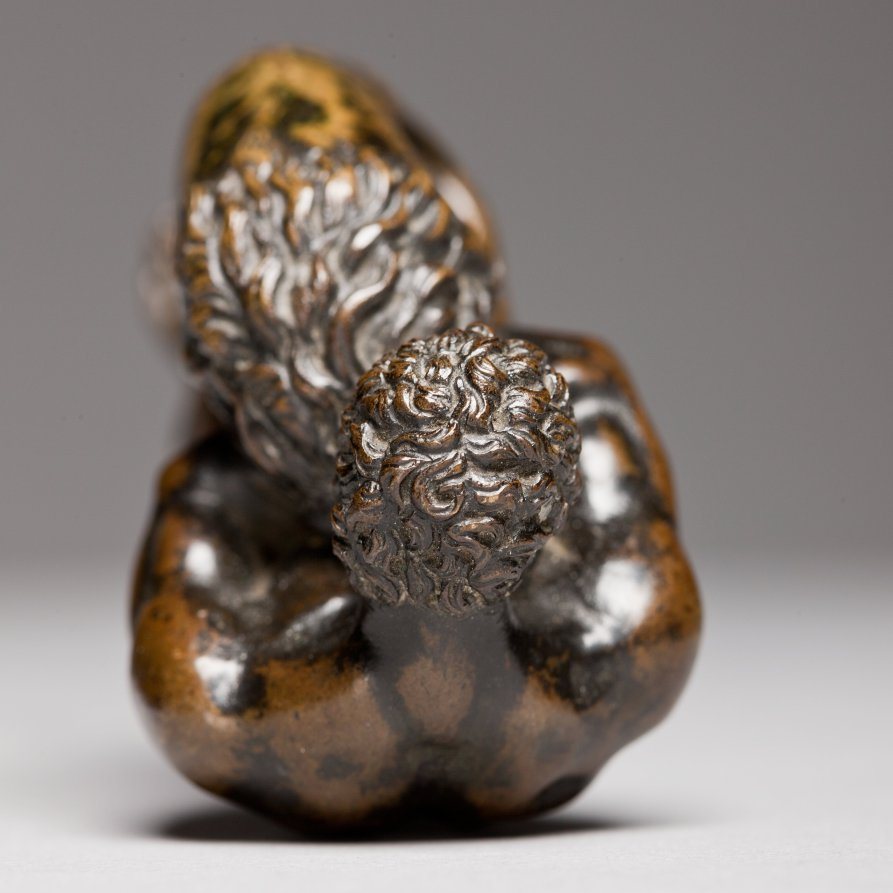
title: Hercules and the Nemean Lion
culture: Italy or France, 16th century or later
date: 1500s or later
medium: bronze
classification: Sculpture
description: The original owner of this work would have understood that this scene referred to the entire story of Hercules, the demi-god who had to accomplish twelve labors. The lion is named after the city of Nemea, near Corinth, a monstrous beast sent by the goddess Hera to wreak havoc on the area. After killing the lion, Hercules wore his pelt, commonly seen in other representations of the hero.